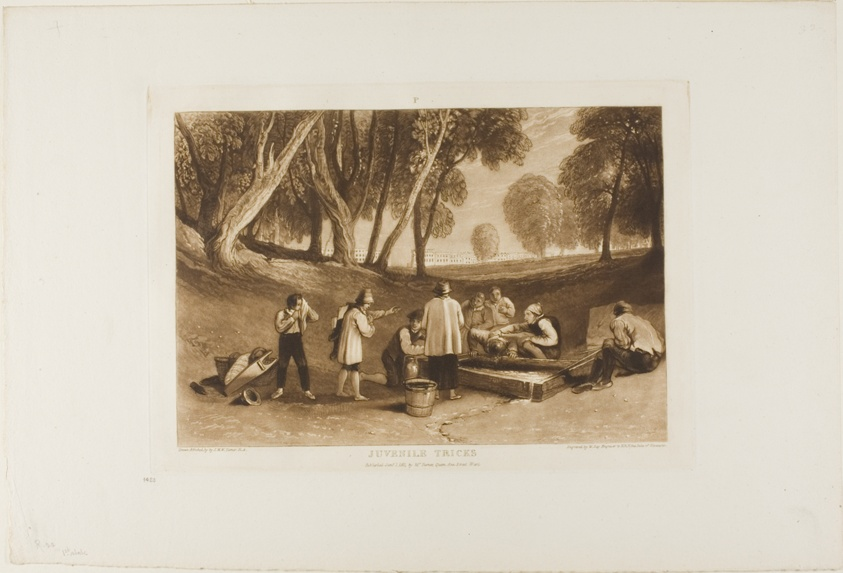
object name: Print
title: Juvenile Tricks, plate 22 from Liber Studiorum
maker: Joseph Mallord William Turner (English, 1775-1851); Engraved by William Say (English, 1768-1834)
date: published January 1, 1811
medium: Etching and engraving in brown on ivory wove paper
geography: England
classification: etching; print; prints and drawing